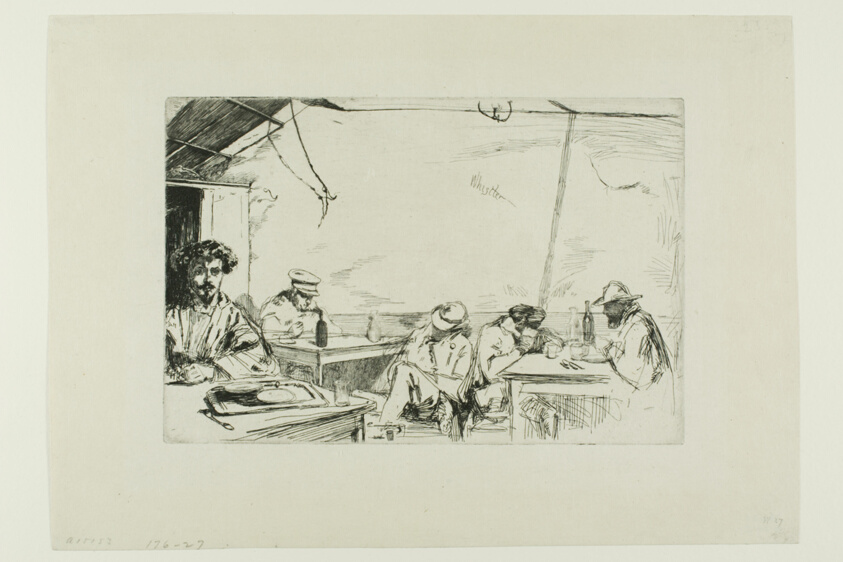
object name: Print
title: Soupe à trois sous (Soup for three sous)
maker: James McNeill Whistler (American, 1834-1903)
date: 1859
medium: Etching with foul biting in black ink on off-white Japanese paper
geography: United States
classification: etching; foul biting; print; prints and drawing; paper